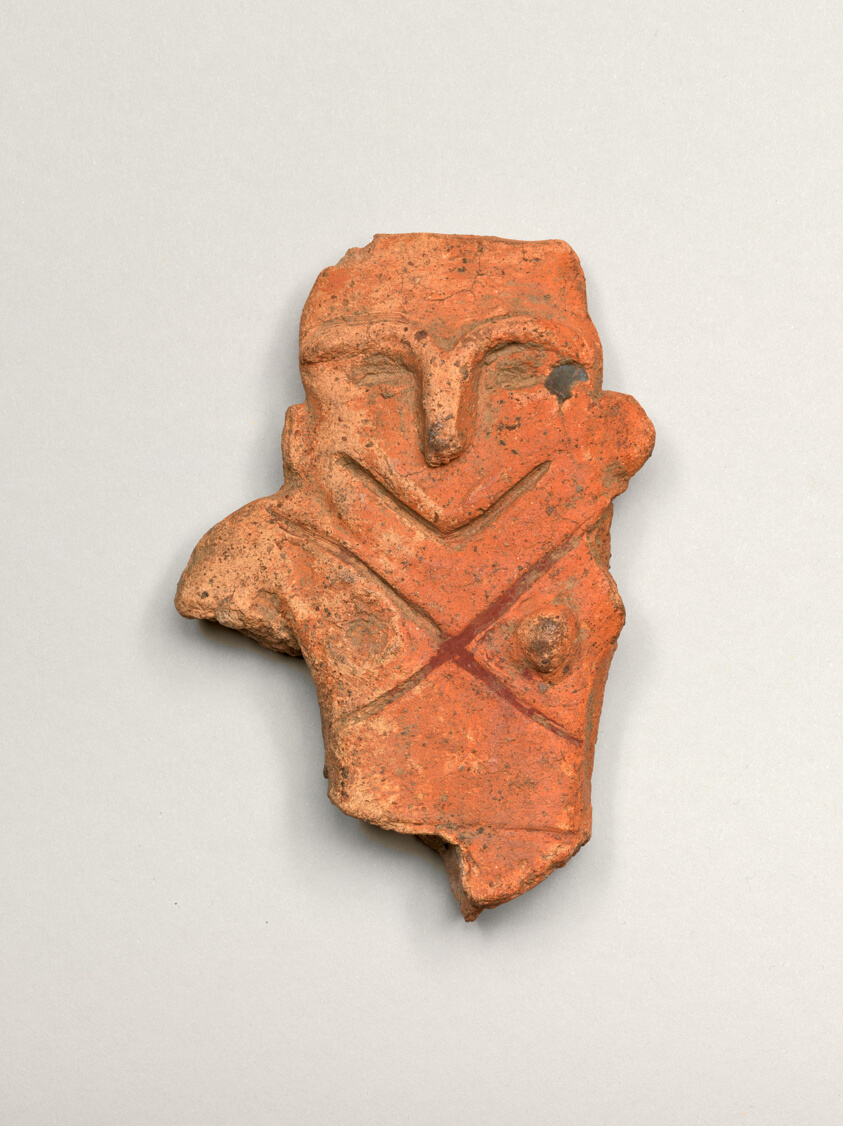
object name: Religious/Ritual Object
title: Smiling Figurine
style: Japanese (culture or style)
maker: Japan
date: c. 1000–300 B.C.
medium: Earthenware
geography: Japan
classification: ritual objects